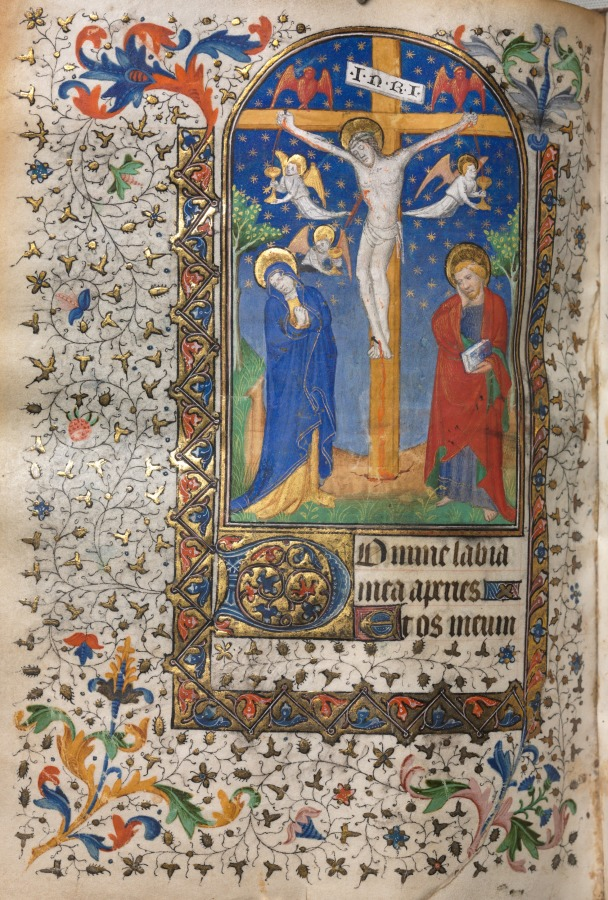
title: Book of Hours (Use of Paris)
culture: France, Paris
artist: follower of Boucicaut Master (French, Paris, active about 1410–25)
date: c. 1420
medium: ink, tempera, and gold on vellum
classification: Bound Volume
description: The Boucicaut Master takes his name from the book of hours he made for Jean de Boucicaut (died 1421), marshal of France, who was taken prisoner by the English at the Battle of Agincourt in 1415. This talented artist, known for his tall, elongated figures with delicate features, exercised profound influence over Parisian manuscript painting during the first decades of the 1400s—a point illustrated by this volume.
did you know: The owner of a book of hours was intended to stop eight times a day and read a devotional text.